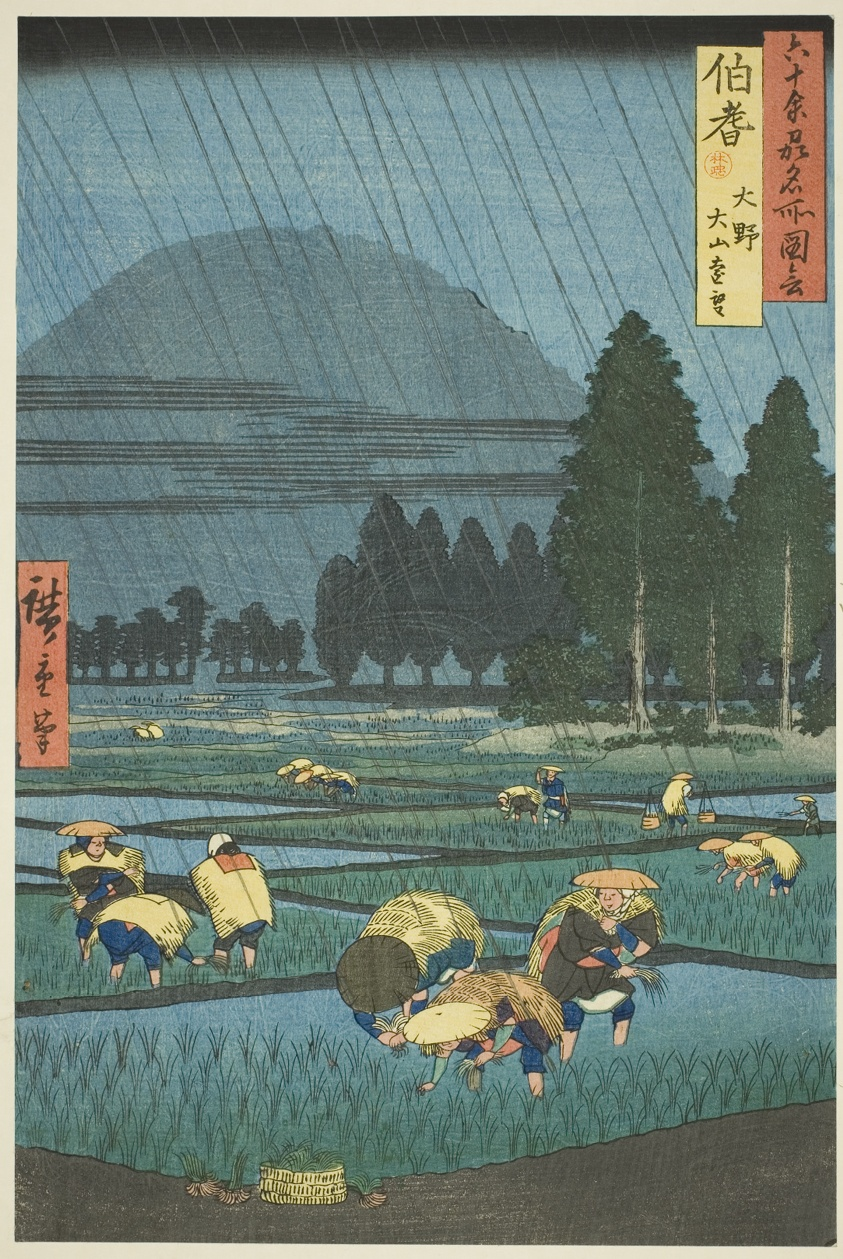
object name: Print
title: Ono, Distant View of Mount Daisen in Hoki Province (Hoki, Ono, Daisen enbo), from the series "Famous Places in the Sixty-odd Provinces (Rokujuyoshu meisho zue)"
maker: Utagawa Hiroshige 歌川 広重; Japanese, 1797-1858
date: 1853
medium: Color woodblock print; oban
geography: Japan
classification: woodblock print; print; asian art